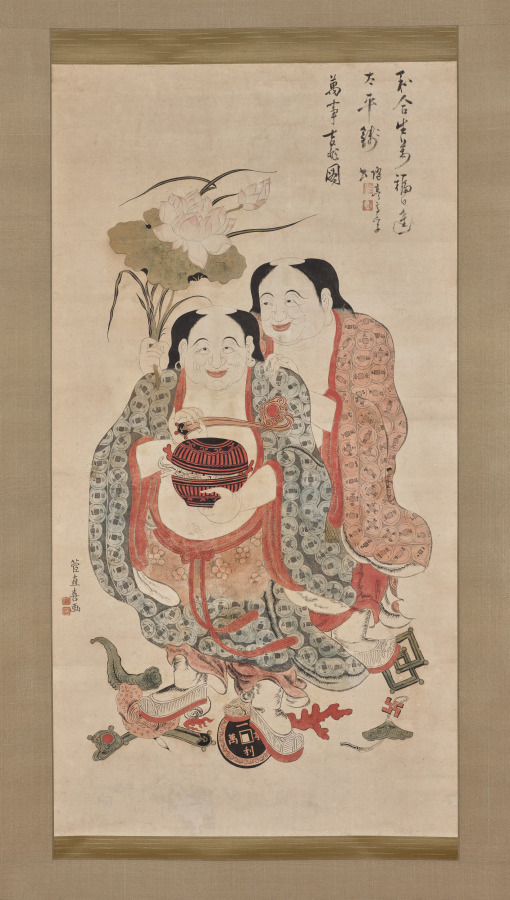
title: The Two Immortals of Harmony and Unity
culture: China, Qing dynasty (1644–1911), Qianlong reign (1736–95)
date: 1736–95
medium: Polychrome woodblock print; ink and color on paper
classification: Print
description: Woodblock printing in color reached a height in China in the 1600s to 1700s. The prints were executed by means of sets of separate blocks, each carved to print a different color.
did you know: In the 1600s, printing flourished in such Jiangnan cities as Nanjing, Suzhou, Hangzhou, and Huizhou, evolving from privately enjoyed illustrated books printed in color to more commercialized single-sheet color prints that were hung on walls and became part of the rich urban visual culture.